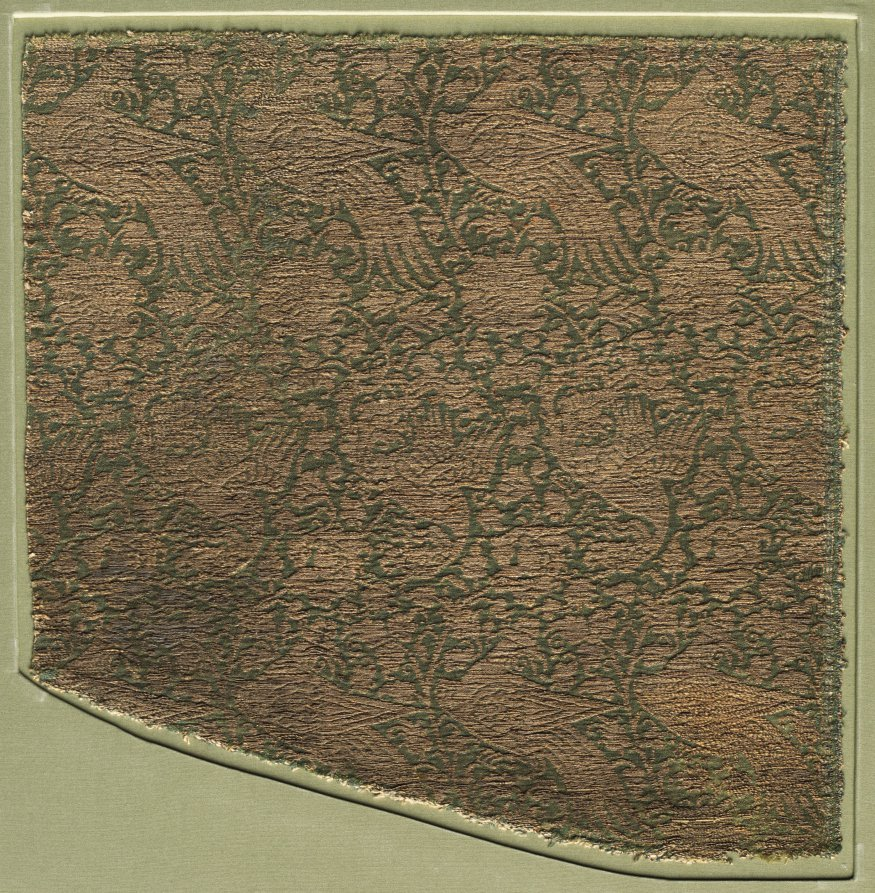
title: Lampas with phoenixes amid undulating vines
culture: Eastern Iran, Ilkhanid period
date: late 1200s-1300s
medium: lampas: silk, cotton, and gold thread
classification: Textile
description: The elegant design of standing or diving phoenixes among parallel, curving floral vines is based on Chinese textiles. The phoenixes are actually of two types (notice the difference in their tails). Their combination, probably an innovation of Yuan China (1279-1368), also appears on the embroidered canopy (cat. no. 60) in this exhibition. In the eastern Iranian world, Chinese motifs and patterns were incorporated into local designs beginning in the 1270s.